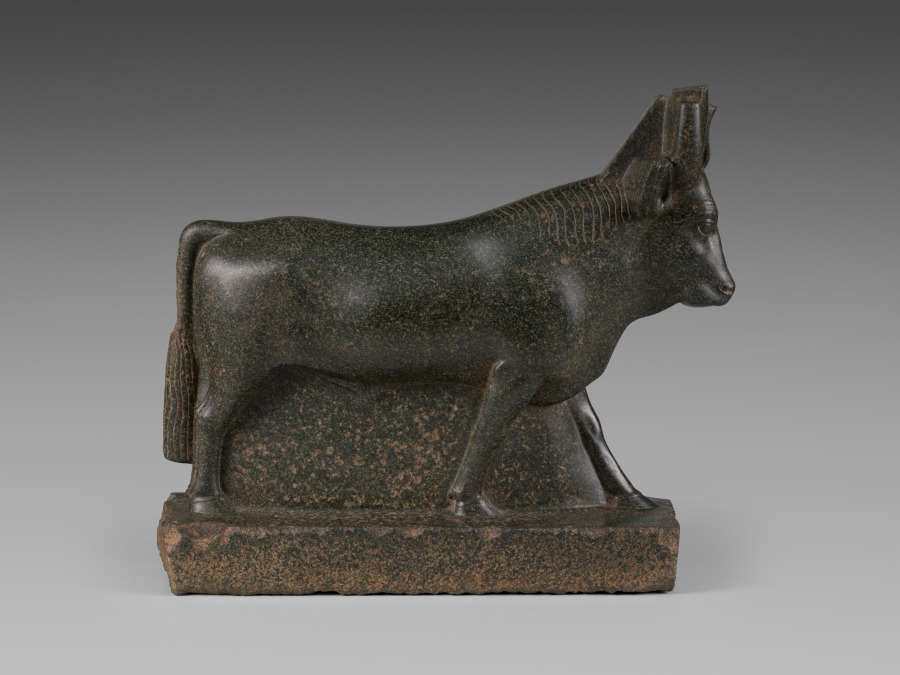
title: Apis Bull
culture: Egypt, Greco-Roman period (332 BCE–395 CE), Ptolemaic dynasty (305–30 BCE)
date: 400–100 BCE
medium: serpentinite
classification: Sculpture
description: Sacred animal cults have a long history in ancient Egypt, but they became even more important in the Ptolemaic and Roman periods. Because each god could incarnate himself into any animal species, beasts of all sorts--dogs, cats, ibises, crocodiles--were protected, venerated, mummified, and collected by the thousands in specialized animal cemeteries. The sacred bull cults were different. Apis, the bull of Memphis, was a god in his own right. But he was also associated with other deities, such as Ptah, the god of Memphis, and Osiris, in the form of Osiris-Apis (or Serapis). Statues and reliefs always show him crowned with a sun disk and cobra. When an Apis bull died, he was given a burial fit for a king in an area of the Memphite cemetery known as the Serapeum.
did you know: A larger base, likely inscribed, may have hidden the rough, unfinished lower edges of this statue.